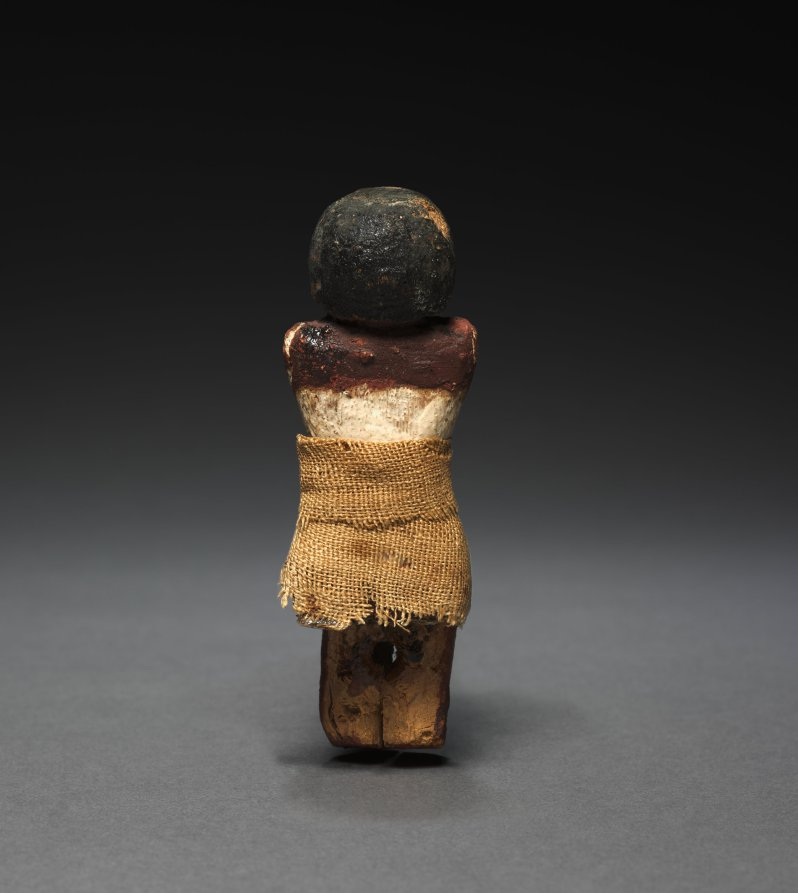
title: Seated Model Sailor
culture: Egypt, Middle Kingdom (2040–1648 BCE), Dynasties 11–12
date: c. 2000–1000 BCE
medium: painted sycamore fig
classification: Funerary Equipment